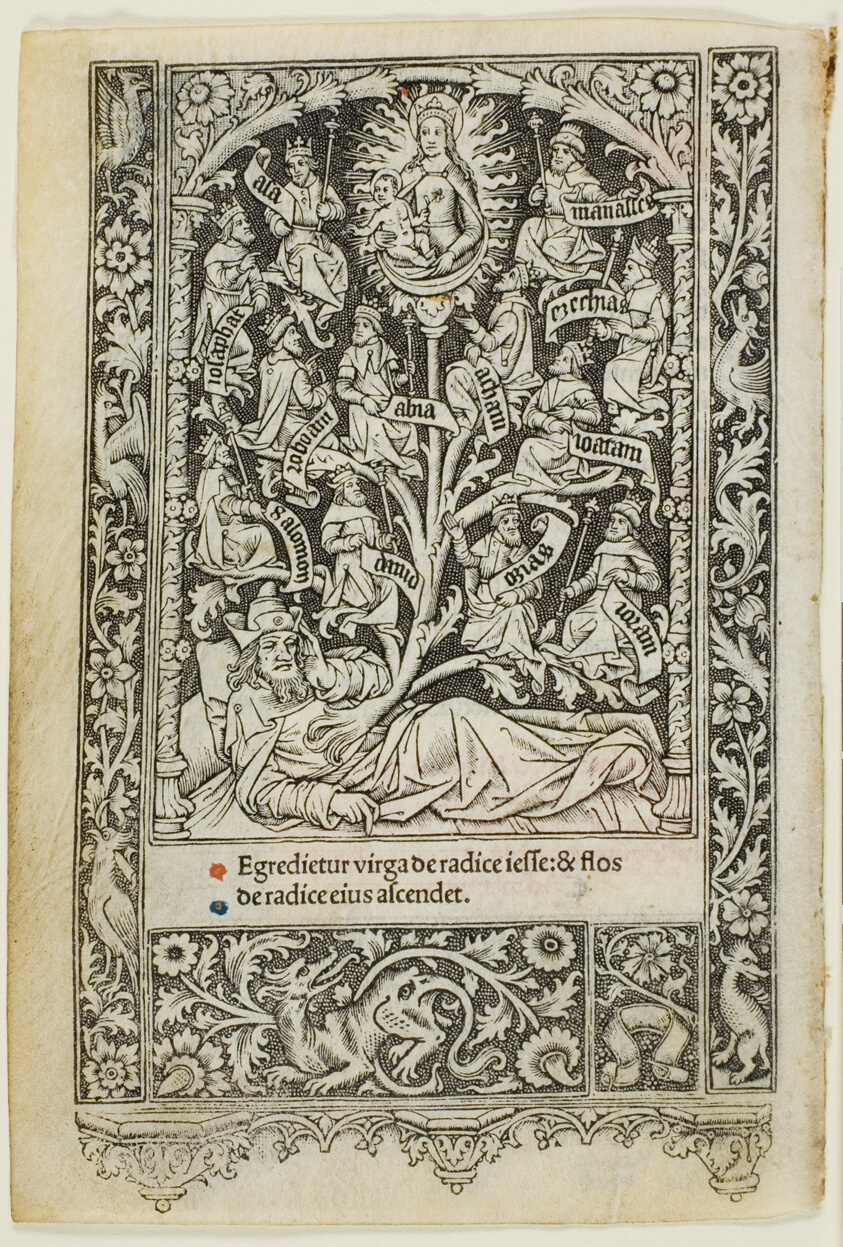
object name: Print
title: The Tree of Jesse, from a book of hours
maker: Thielmann Kerver (German, flourished 1497-1524)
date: 1505/10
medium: Metalcut and letterpress, with hand-coloring, on parchment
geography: Germany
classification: woodcut; print; prints and drawing